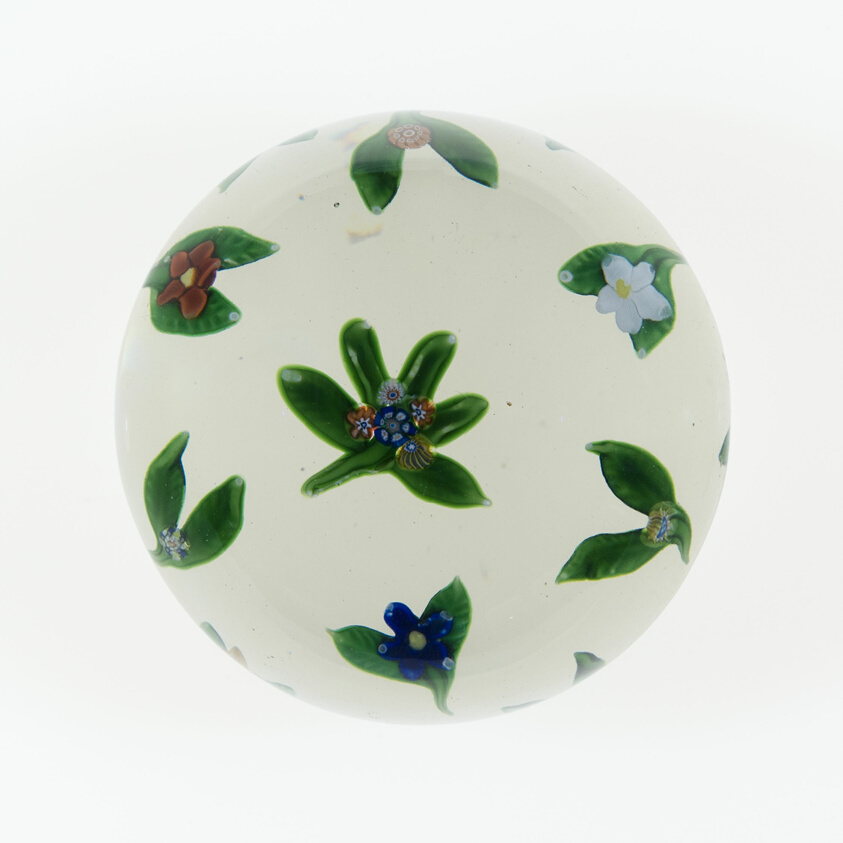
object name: Glass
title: Paperweight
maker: Saint-Louis Glassworks (Cristalleries de Saint-Louis); Lorraine, France, founded 1586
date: c. 1848–55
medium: Glass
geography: Saint-Louis-lès-Bitche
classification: paperweight; lampwork; european decorative arts; glass